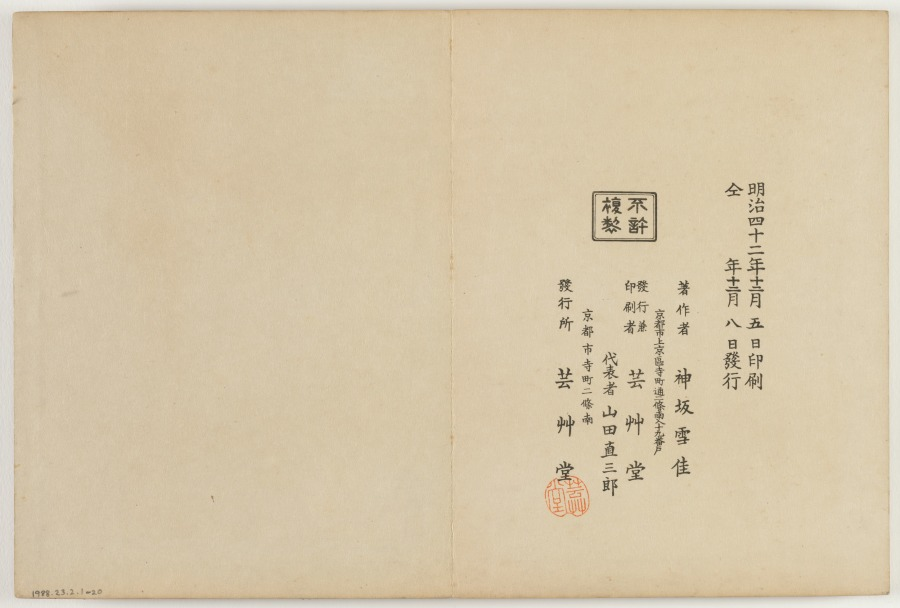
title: Flowers of a Hundred Worlds (Momoyogusa), Vol. 2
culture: Japan, Meiji period (1868–1912)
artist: Kamisaka Sekka (Japanese, 1866–1942)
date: 1909–10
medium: one of a set of three woodblock printed folding-books; ink, color, gold, and silver on paper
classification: Bound Volume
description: This volume from a set of three woodblock printed albums displays the graphic design prowess of Kamisaka Sekka. The images were first distributed one by one to subscribers to the series but later were reissued in bound form, like this book, for mass consumers. Each print features a vignette taken from nature or Japanese literature. Many of the scenes have a long history in Japan, originating in the 900s or 1000s and having been interpreted by all manner of artists since that time. Sekka’s selections hew closely to precedents from the Rinpa style originated by painter Tawaraya Sōtatsu (c. 1570–c. 1640) and calligrapher Hon’ami Kōetsu (1558–1637).